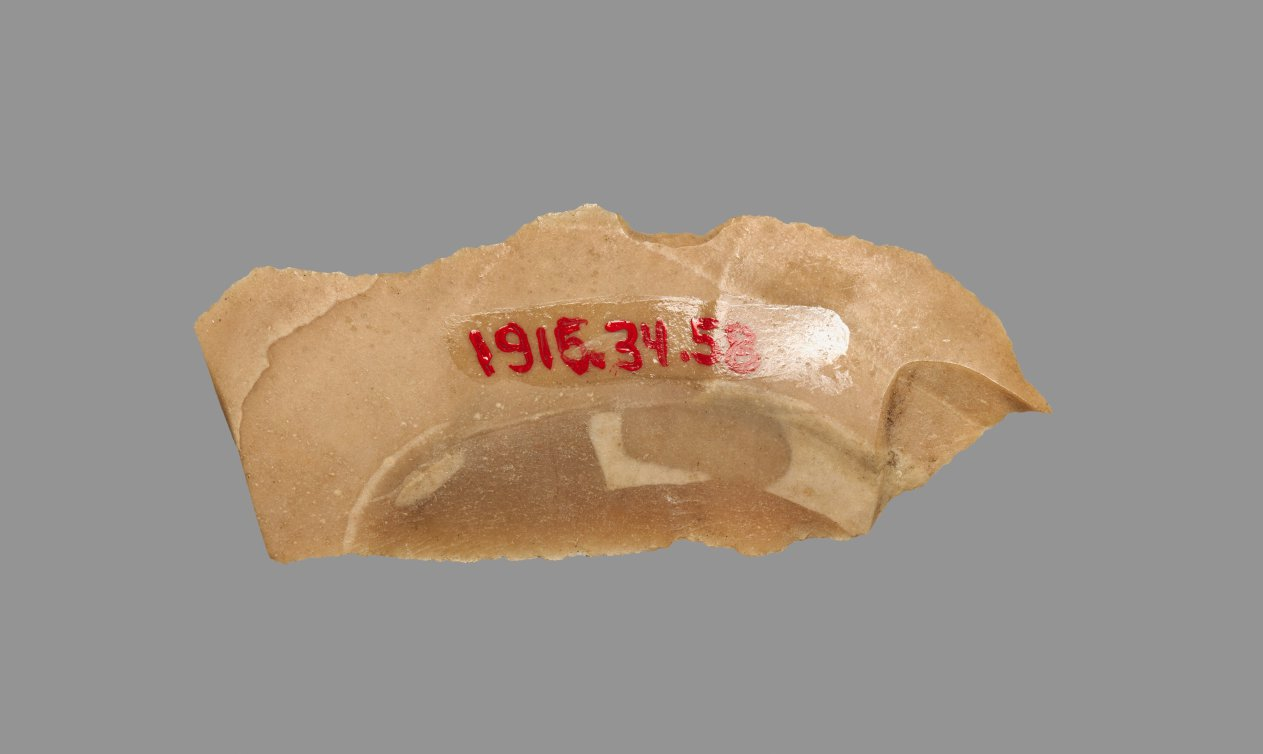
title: Sickle Blade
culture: Egypt, Middle Kingdom (2040–1648 BCE), Dynasty 12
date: 1980–1801 BCE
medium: flint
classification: Implements